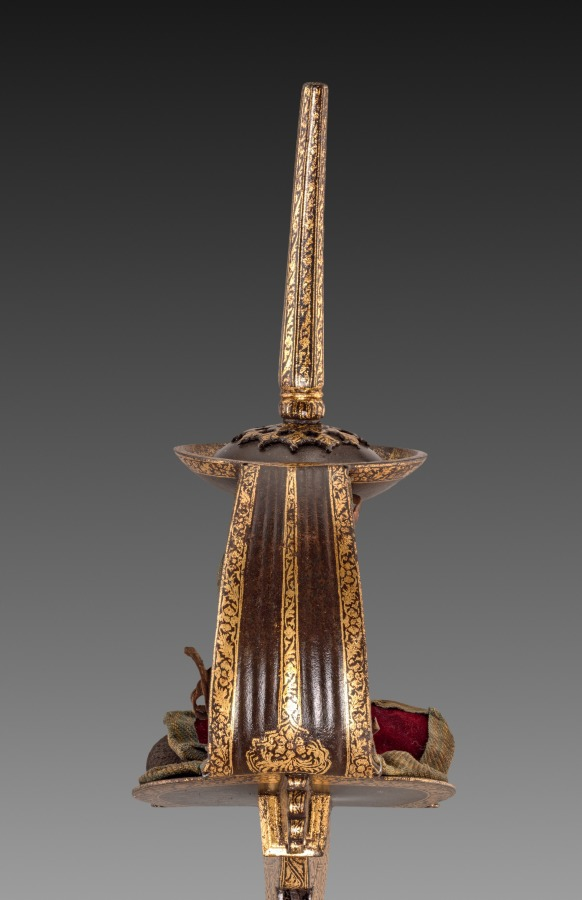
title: Sword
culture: India, perhaps Deccan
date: 1700s–1800s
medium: Watered steel blade with iron hilt inlaid with gold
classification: Arms and Armor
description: Straight swords were typical of those used among military and aristocratic circles in the southern regions of the Deccan, in contrast to the curved swords favored by Central Asian equestrians. Increased contact between the Mughal north and the Deccan south during the 1600s led to the appearance of the Deccan-style sword in courtly portraits made during the time of Jahangir and Shah Jahan, and later.